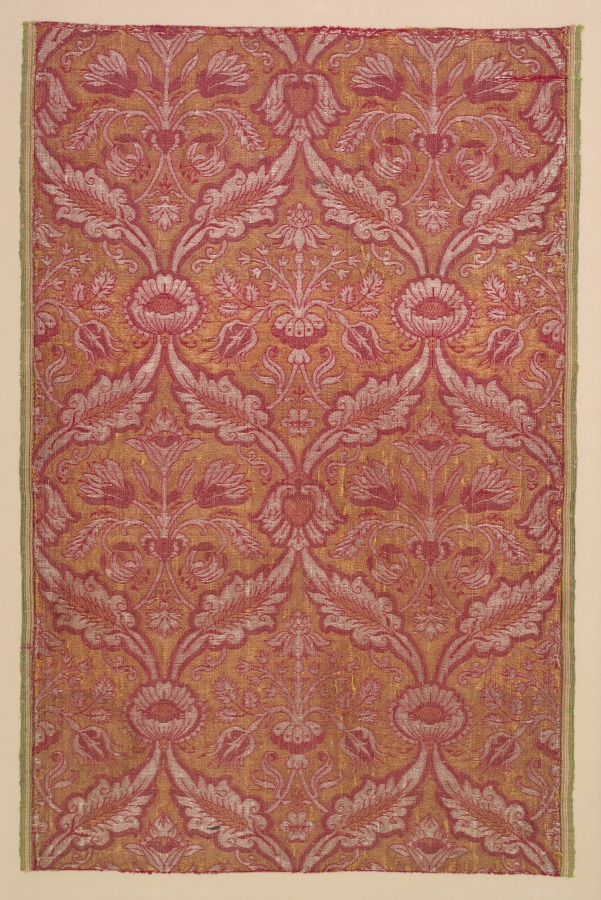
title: Textile with Flora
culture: Italy or Spain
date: c. 1500s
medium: silk, linen, silver thread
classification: Textile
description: This luxurious furnishing fabric might have been a wall covering or part of a long robe. The pattern of floral bouquets framed by curved leaves was popular in Italy, Spain, and Turkey during the 16th century. Darkened by oxidation, the fine silver weft, or horizontal, threads would have once shone brightly and glittered in the flickering candlelight that illuminated rooms before electricity. The preserved selvage edges reveal the width of the original loom; the edge’s color and style may even indicate the quality of the silk thread and the identity of the guild that wove it.